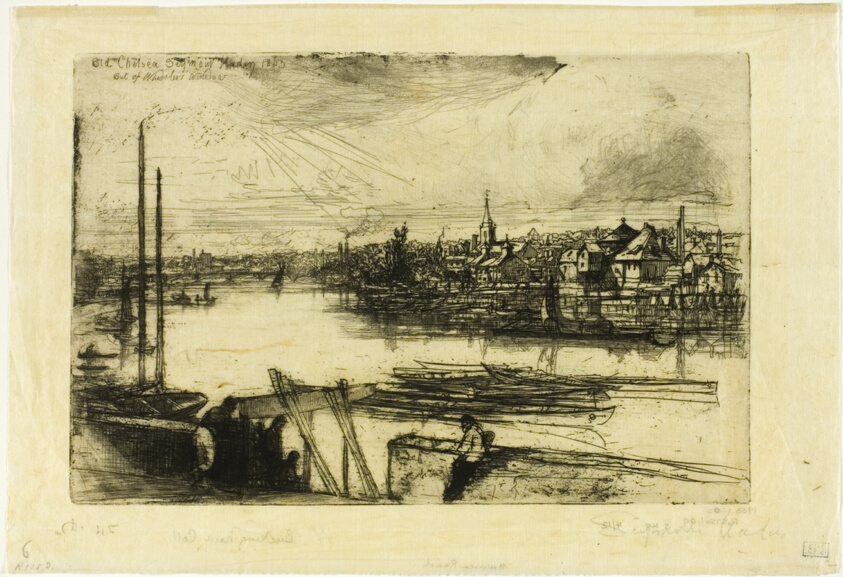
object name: Print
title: Battersea Reach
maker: Francis Seymour Haden (English, 1818-1910)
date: 1863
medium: Etching with drypoint on ivory Japanese paper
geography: England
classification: etching; print; prints and drawing